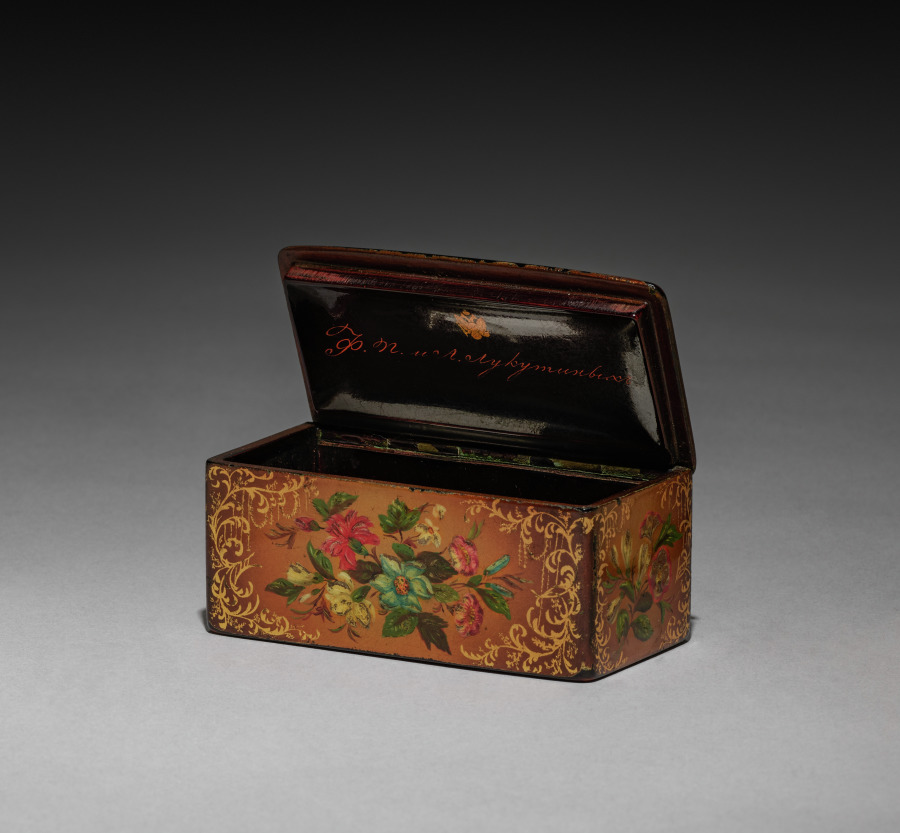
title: Box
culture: Russia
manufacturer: Lukutin Factory (Russian, 1818–1904)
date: 1830–81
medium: lacquered wood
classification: Miscellaneous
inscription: inscription on interior.